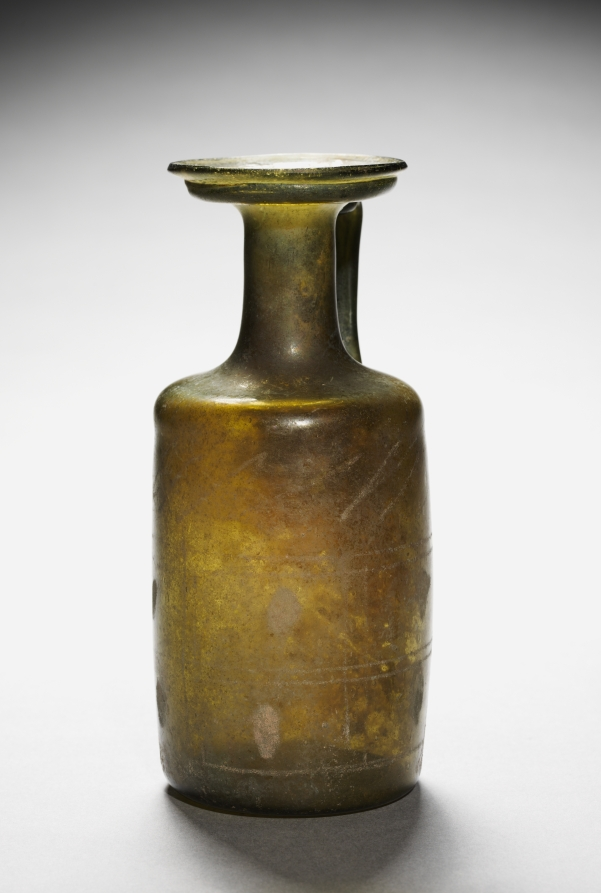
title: Pitcher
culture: Syro-Palestinian, Roman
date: 200–400 CE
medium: glass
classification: Glass